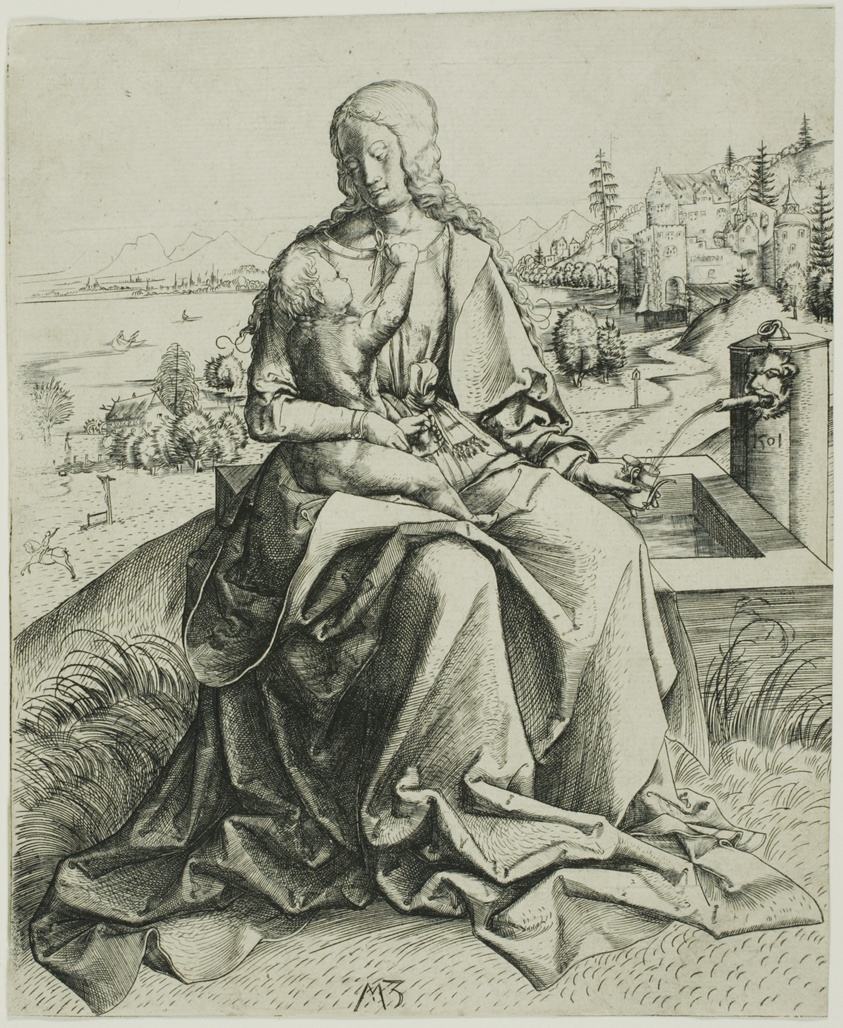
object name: Print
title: The Madonna by the Fountain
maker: Master M.Z.; German, active 1500-1550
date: 1501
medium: Engraving on ivory laid paper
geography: Germany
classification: engraving; print; prints and drawing